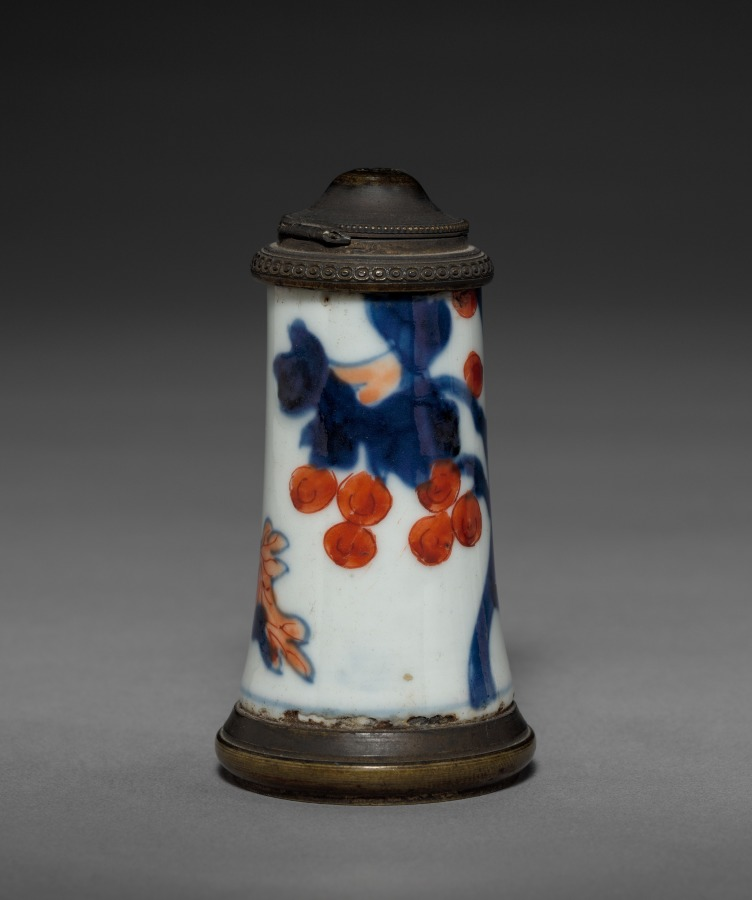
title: Imari Ware (?) Container with Brass Mounts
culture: Japan, Edo period (1615–1868)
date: late 1600s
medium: porcelain with brass mounts (possibly Hizen ware, Arita type, Imari style)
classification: Ceramic